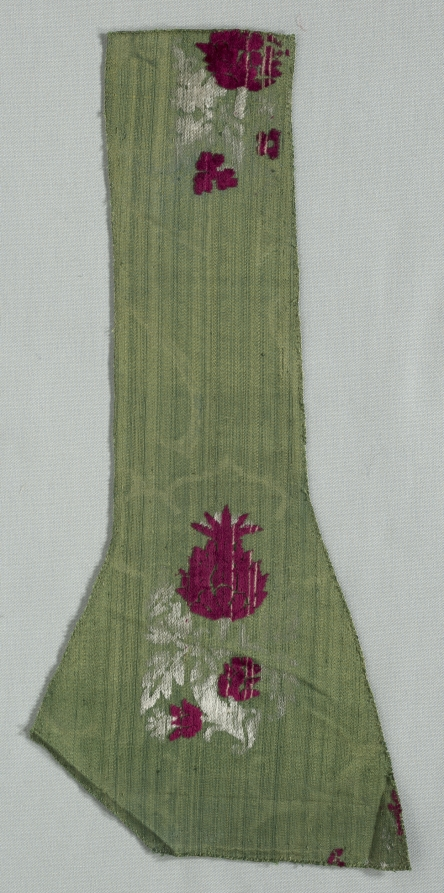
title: Velvet Fragment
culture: Italy, mid 15th century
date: 1440–1460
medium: velvet (cut and voided); silk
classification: Velvet